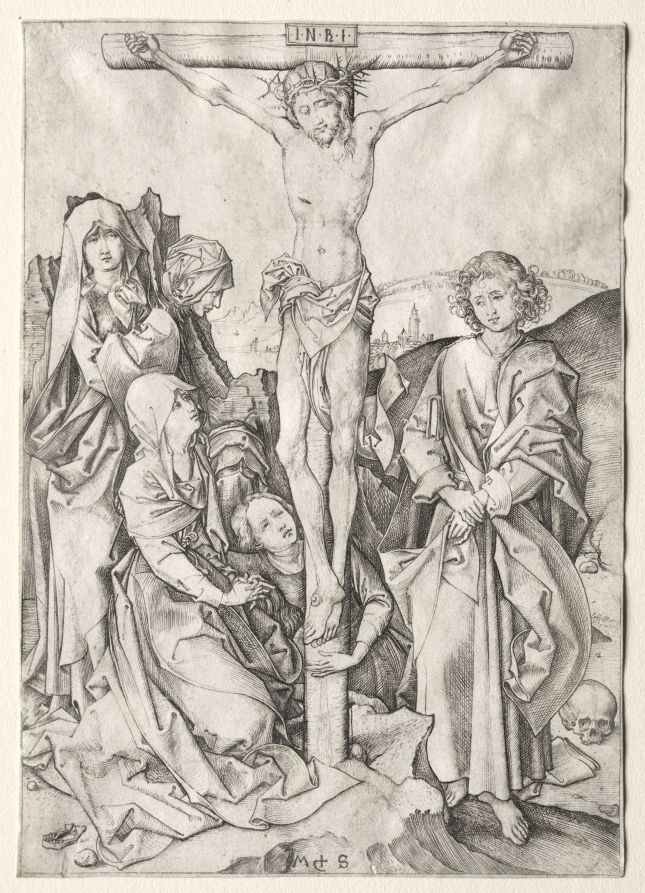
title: The Passion: Christ on the Cross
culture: Germany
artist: Martin Schongauer (German, c. 1450–1491)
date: c. 1480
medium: engraving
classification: Print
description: Martin Schongauer's series of the Passion of Christ was his largest set of engravings, made around 1480, and extensively copied across Europe. It consists of twelve prints detailing the suffering of Christ in the last days of his life. Schongauer's version focuses on crowded scenes, grotesque physiognomies of Christ's tormentors, and great pathos in the compositions. Here, Saint John the Evangelist and four mourning women gather around the cross on which Christ's emaciated body rests. These figures were meant to model the emotional compassion to be felt by the viewer.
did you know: The skull that lies on the ground behind Saint John alludes to the Golgotha, the site of Christ's crucifixion, also believed to be the place where Adam died.